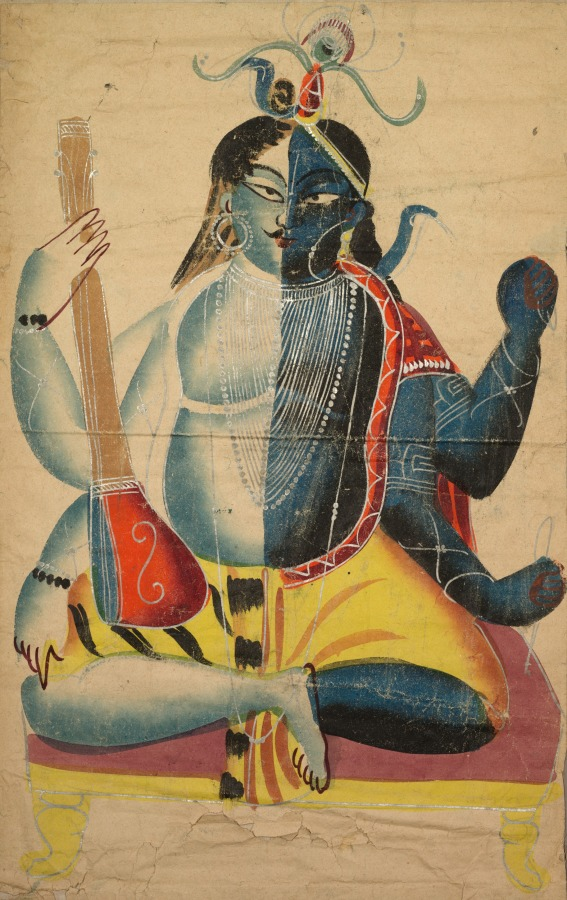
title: Hari-Hara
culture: Eastern India, Bengal, Kolkata, Kalighat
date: c. 1890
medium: Gum tempera, graphite, ink, and tin on paper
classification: Painting